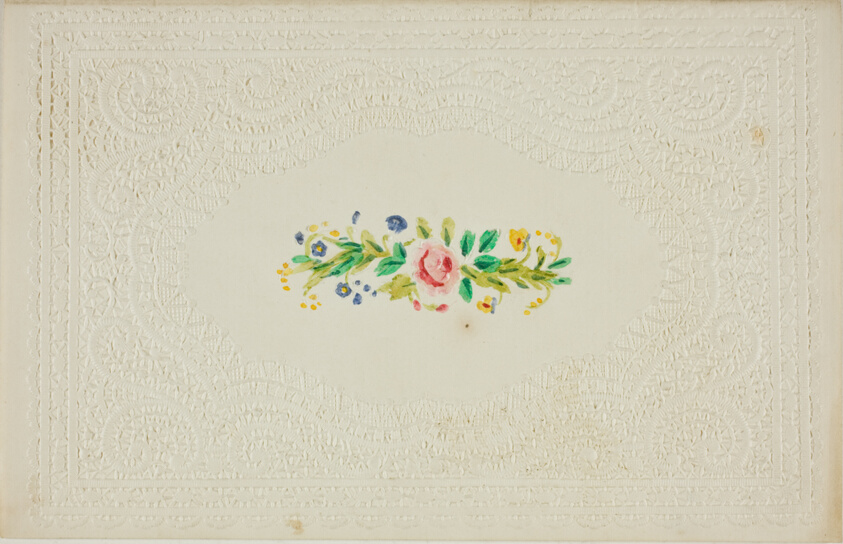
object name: Drawing and Watercolor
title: Untitled Valentine (Flowers)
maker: Unknown Artist; English, 19th century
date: c. 1850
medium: Watercolor on embossed ivory laid paper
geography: England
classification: valentine; prints and drawing; paper